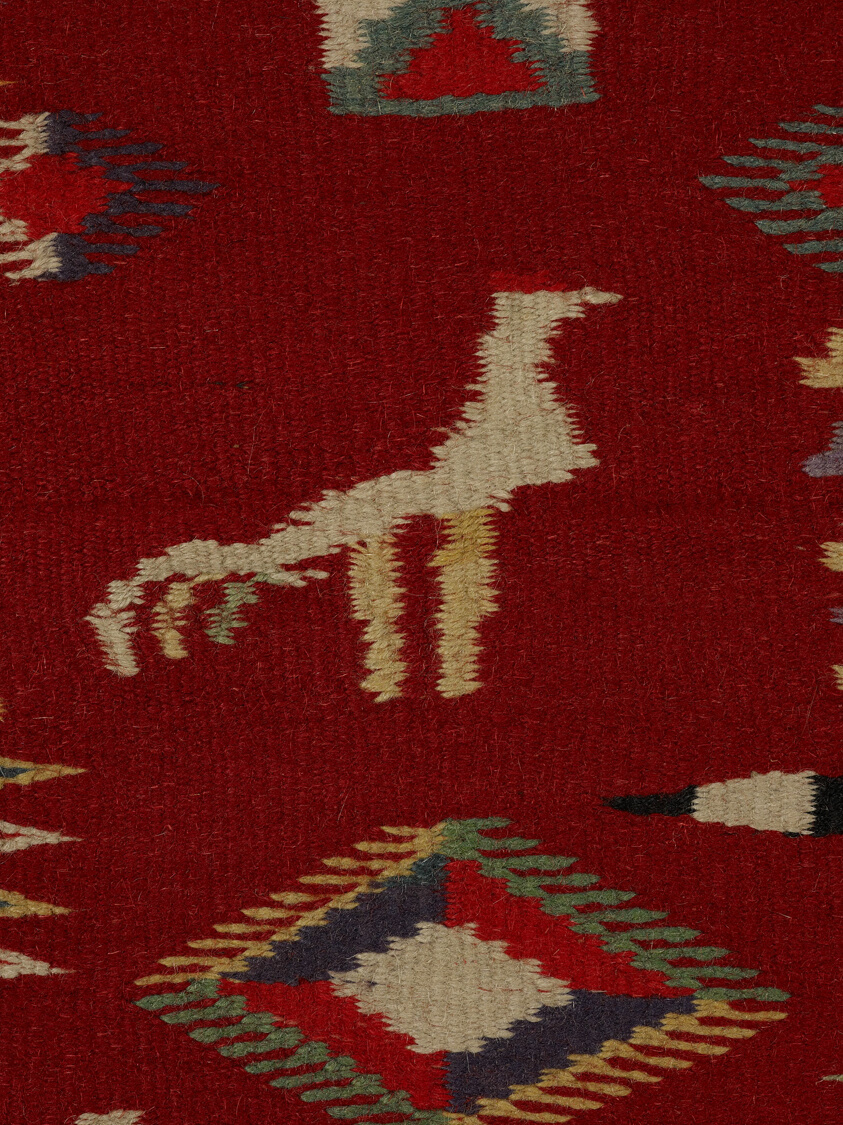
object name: Textile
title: "Eye-Dazzler" Weaving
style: navajo, native american, americas, Folk Art, 19th century, indigenous, north american, native north american, eye-dazzler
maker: Navajo (Diné) (Arizona, New Mexico, and Utah, United States)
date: 1880/1900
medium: Cotton and wool, single interlocking tapestry weave; twined selvages and heading, overcast finish terminating in tassels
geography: Navajo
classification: textile; weaving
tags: geometric, zigzags